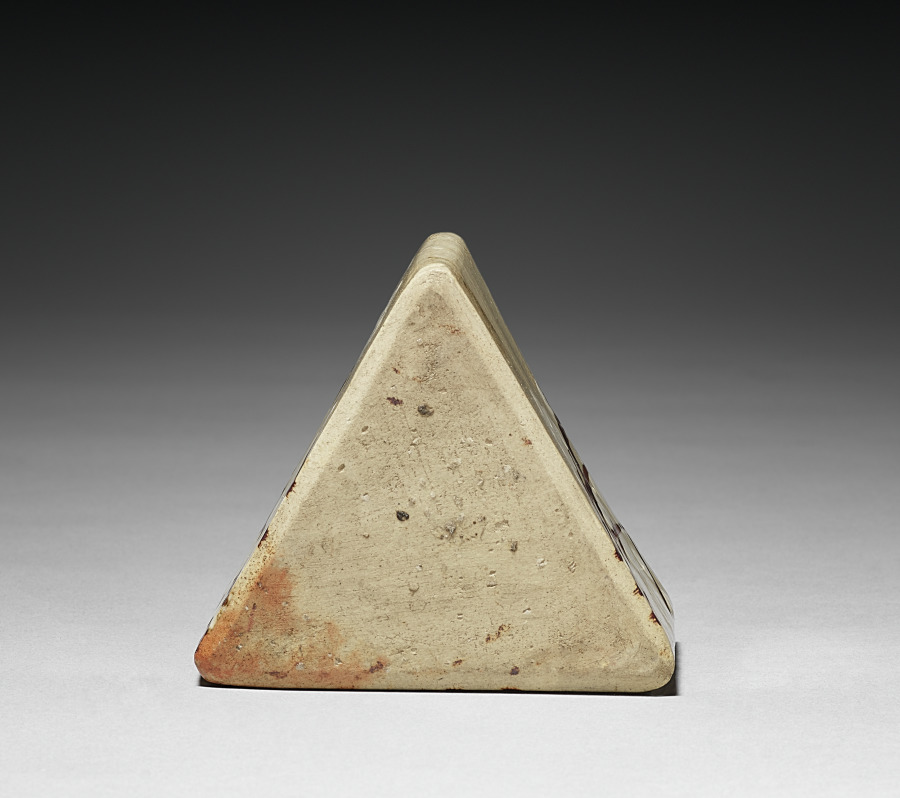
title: One of Five Serving Bowls (Mukozuke) with Prunus Design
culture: Japan, Edo period (1615–1868)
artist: school of Ogata Kenzan (Japanese, 1663–1743)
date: 1700s to mid-1800s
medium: Kyoto Ware: stoneware with underglaze iron oxide and slip decoration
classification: Ceramic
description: Note the rough, tan, clay bodies of these bowls with their deliberate irregularities. The design of branches was first painted in a black iron oxide, then the blossoms and buds in a white slip, followed by the application of a very thin transparent overglaze.